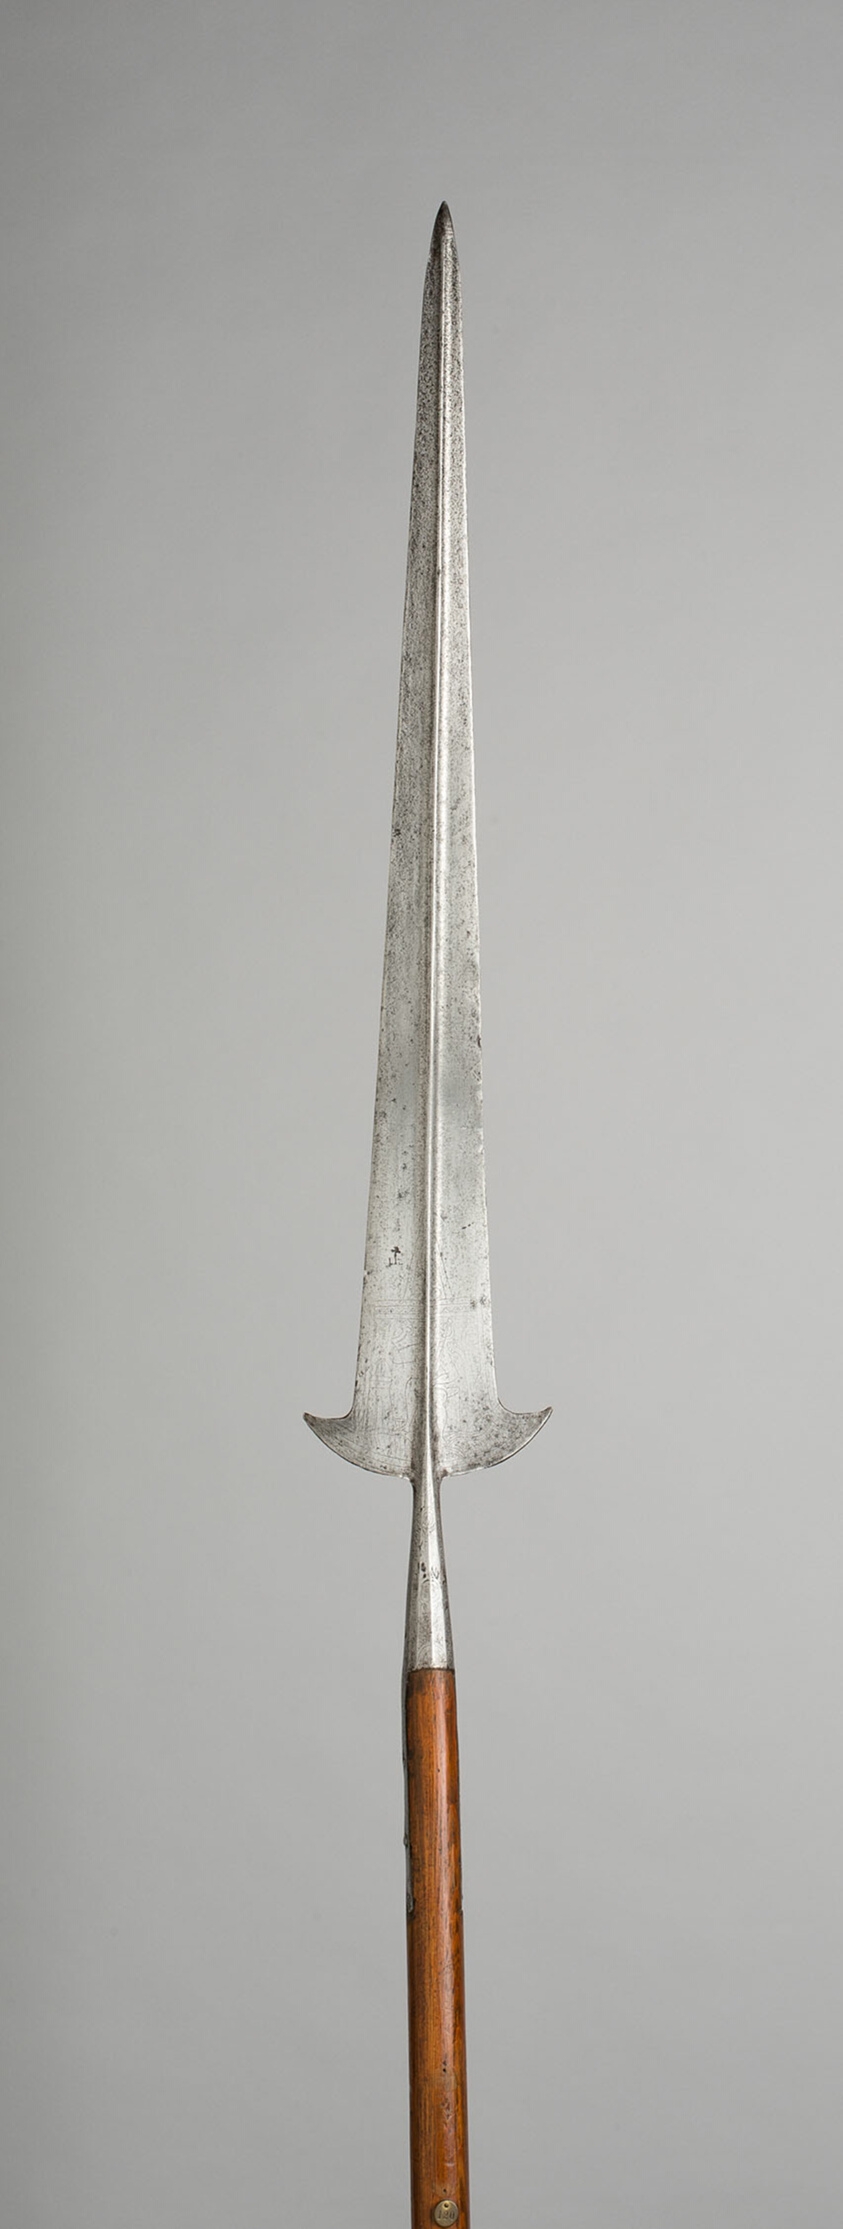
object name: Arms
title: Partisan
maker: Italian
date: 1520-1540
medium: Steel and wood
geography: France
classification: edged weapon-staff; arms; arms and armor